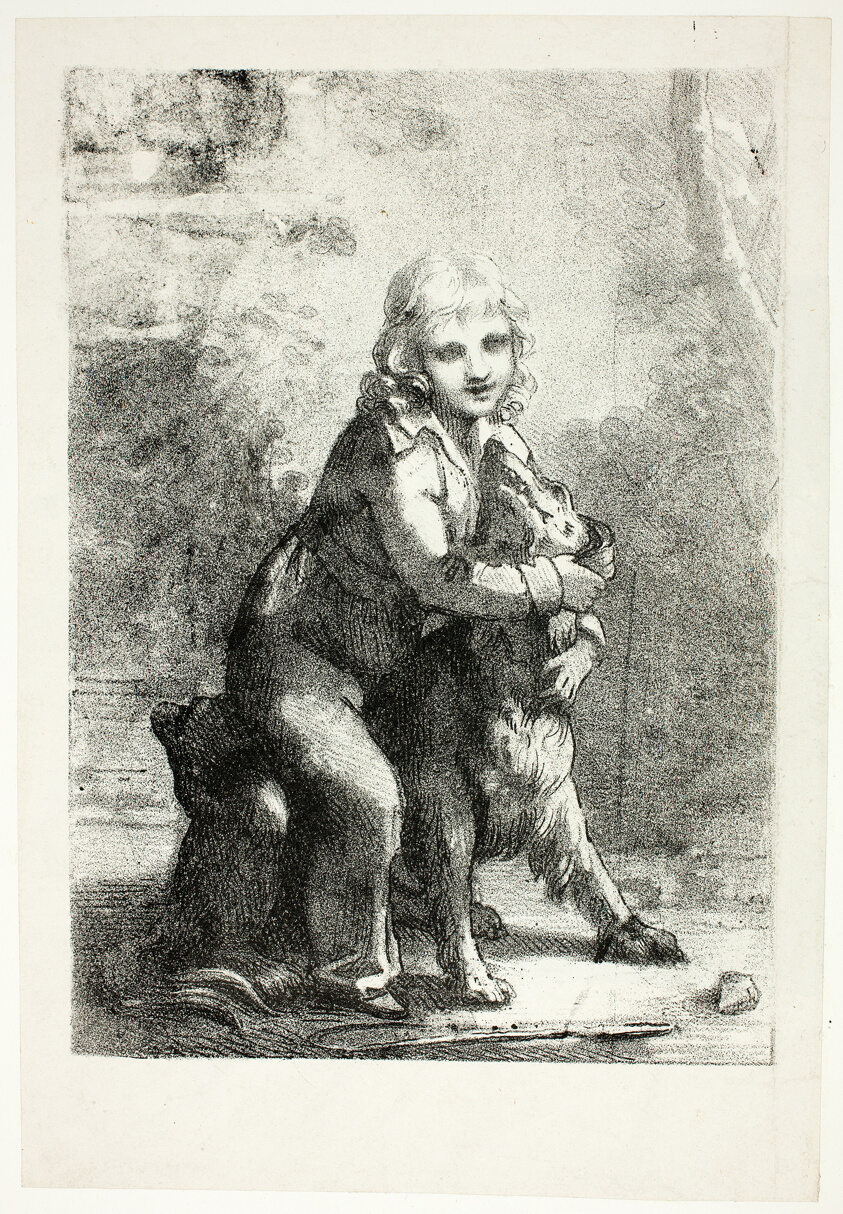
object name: Print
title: Child with Dog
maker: Pierre-Paul Prud'hon; French, 1758-1823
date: 1822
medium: Lithograph in black, with scraping on stone, on grayish ivory laid chine, laid down on ivory wove paper (chine collé)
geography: France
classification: lithograph; print; prints and drawing